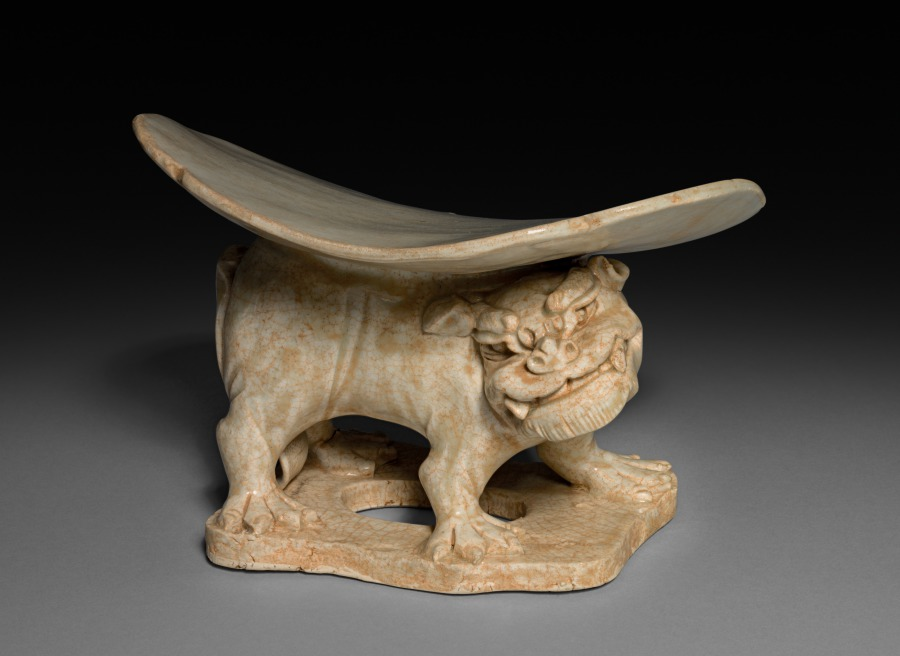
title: Pillow with Lion Base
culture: China, Northern Song dynasty (960-1127)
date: 1000s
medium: Glazed stoneware, qingbai ("blue-white") ware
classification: Ceramic